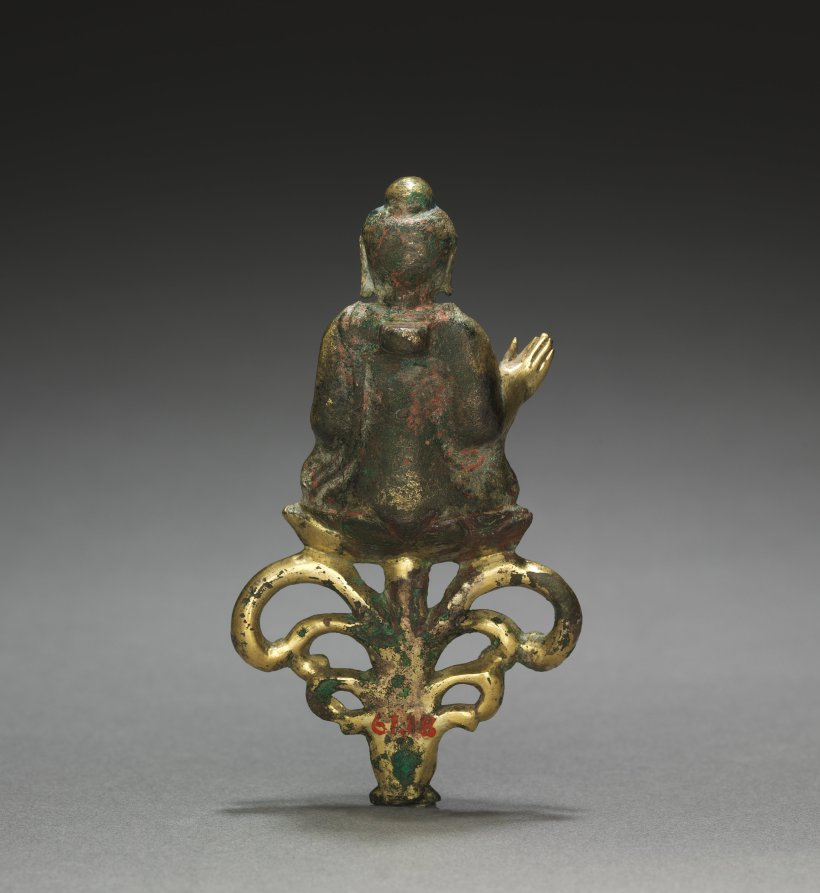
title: Seated Buddha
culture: China, Tang dynasty (618-907)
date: 600s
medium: gilt bronze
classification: Sculpture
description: Portable Buddhist figures and objects like this gilt bronze had a variety of uses. They could have been carried in religious processions. Others could serve as donations, souvenirs, or votive items in the context of pilgrimages to religious sites. Their miniature size also made them appropriate for placement on private altars or shrines for personal devotion.